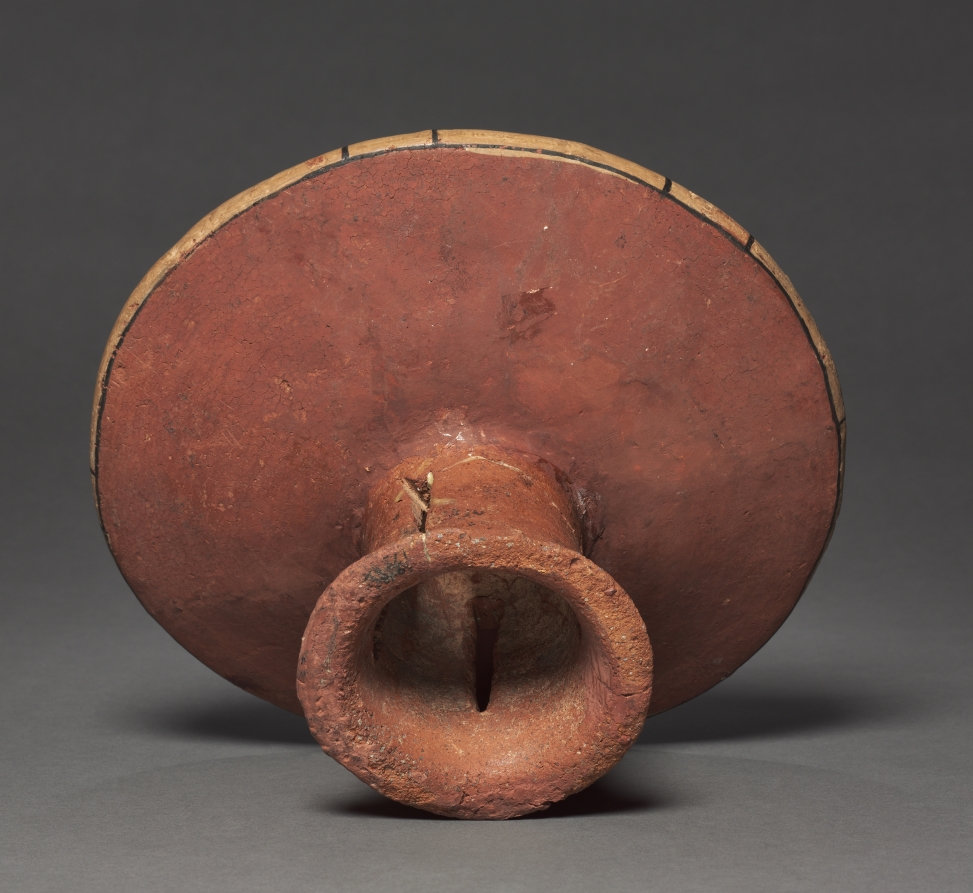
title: Pedestal Plate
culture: Panama, Coclé, 14th-15th century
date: 1300s-1400s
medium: earthenware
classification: Ceramic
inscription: Inscribed on base: "50-18-20/1 (?) 3 (?) 86"